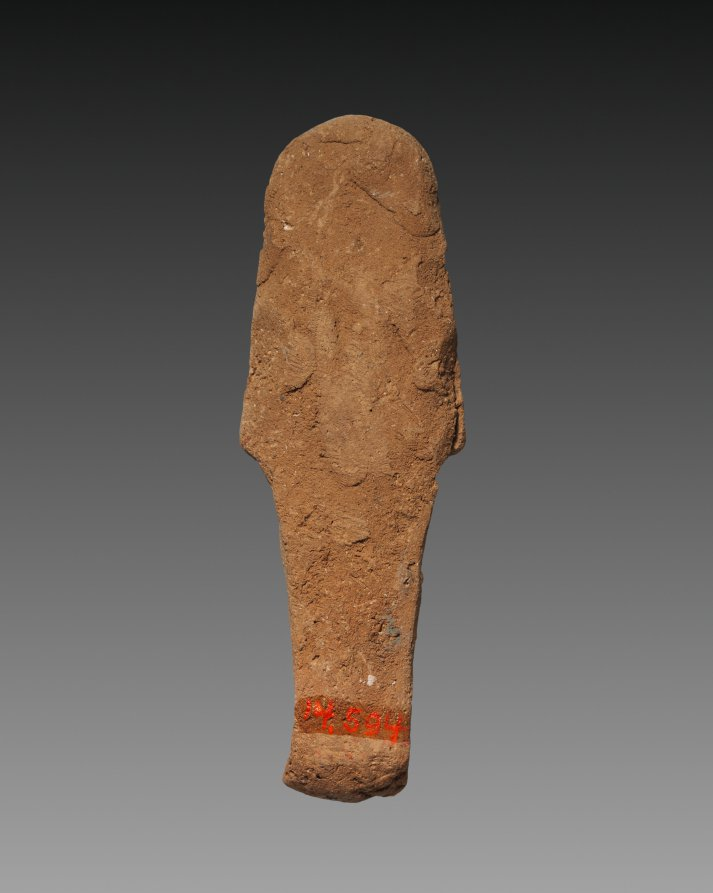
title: Shawabty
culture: Egypt, Third Intermediate (1069–715 BCE), Dynasty 21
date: 1069–845 BCE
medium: terracotta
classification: Funerary Equipment